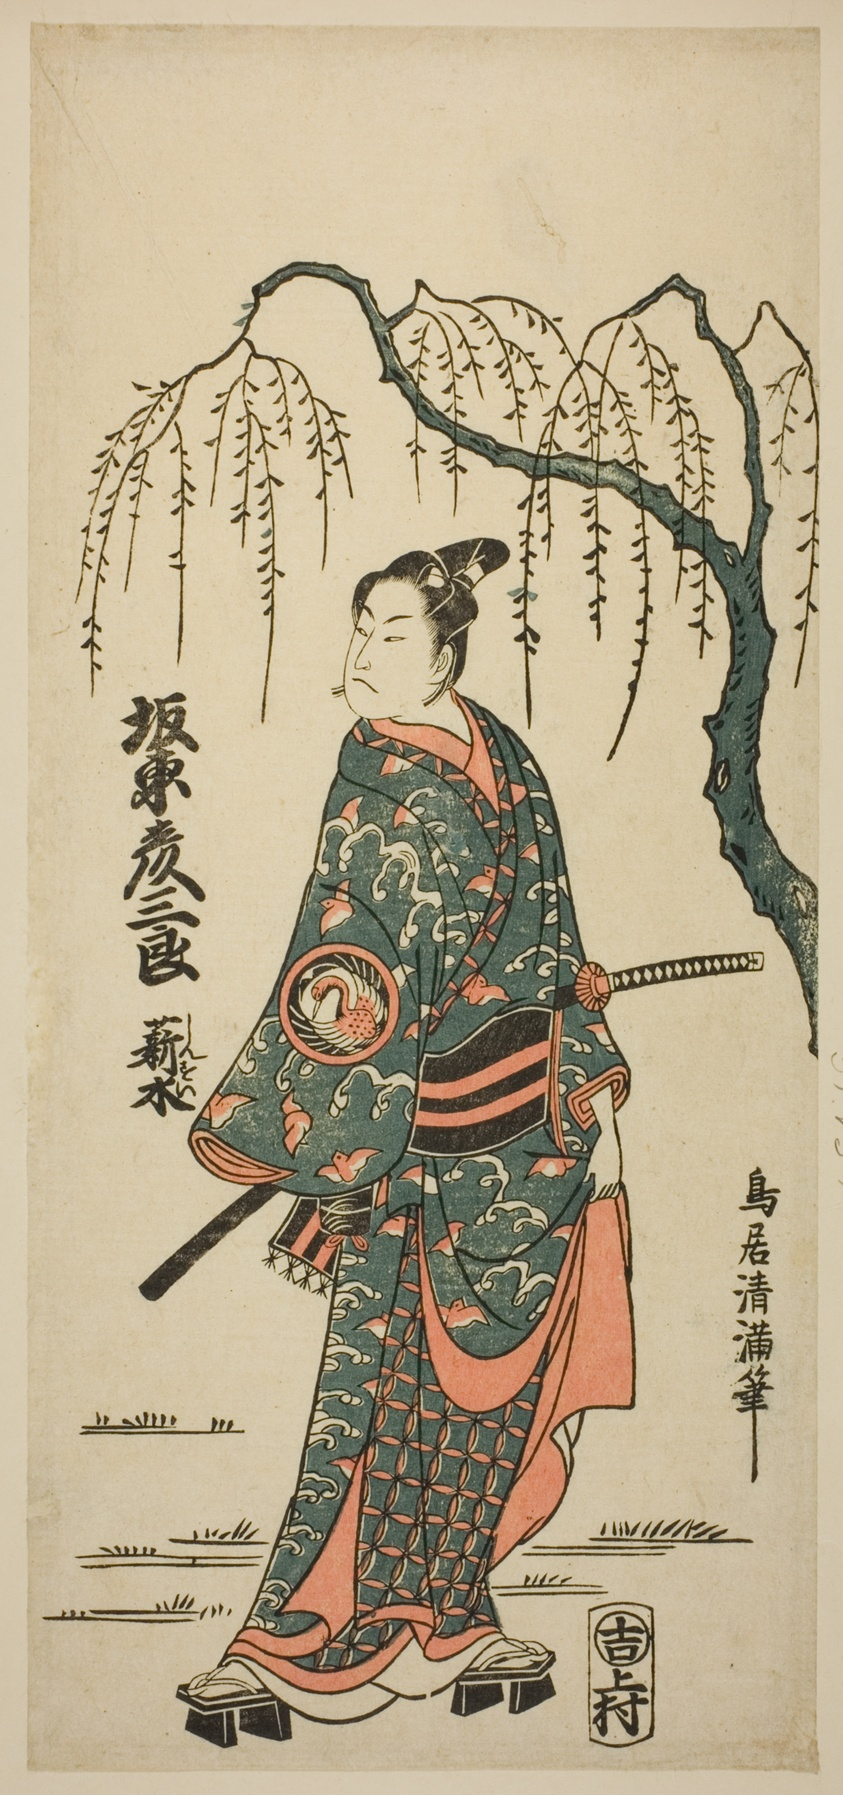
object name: Print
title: The Actor Bando Hikosaburo II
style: Japanese (culture or style)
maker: Torii Kiyomitsu I (Japanese, 1735–1785)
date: c. 1760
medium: Color woodblock print; hosoban, benizuri-e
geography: Japan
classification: woodblock print; print; asian art